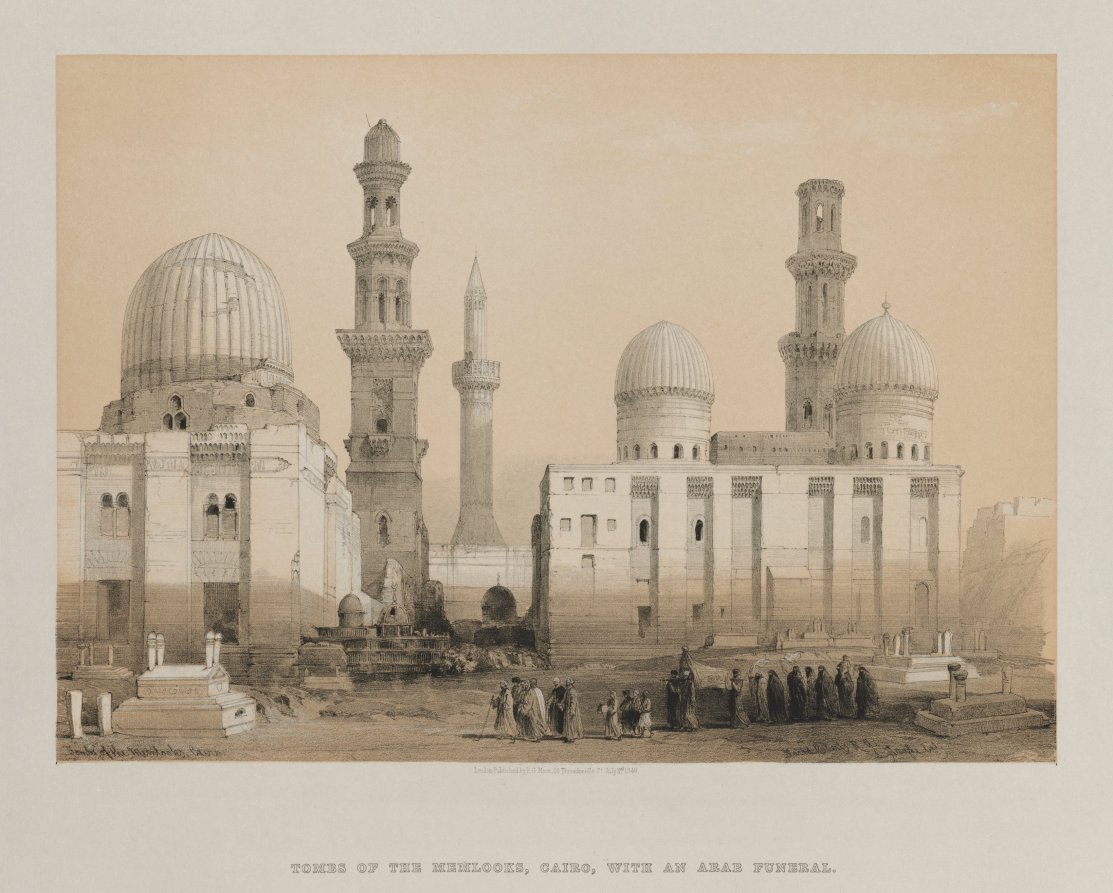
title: Egypt and Nubia, Volume III: Tomb of the Memlooks, Cairo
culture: England, 19th century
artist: Louis Haghe (British, 1806–1885)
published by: F. G. Moon, 20 Threadneedle Street, London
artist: after David Roberts (Scottish, 1796–1864)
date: 1849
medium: color lithograph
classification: Print